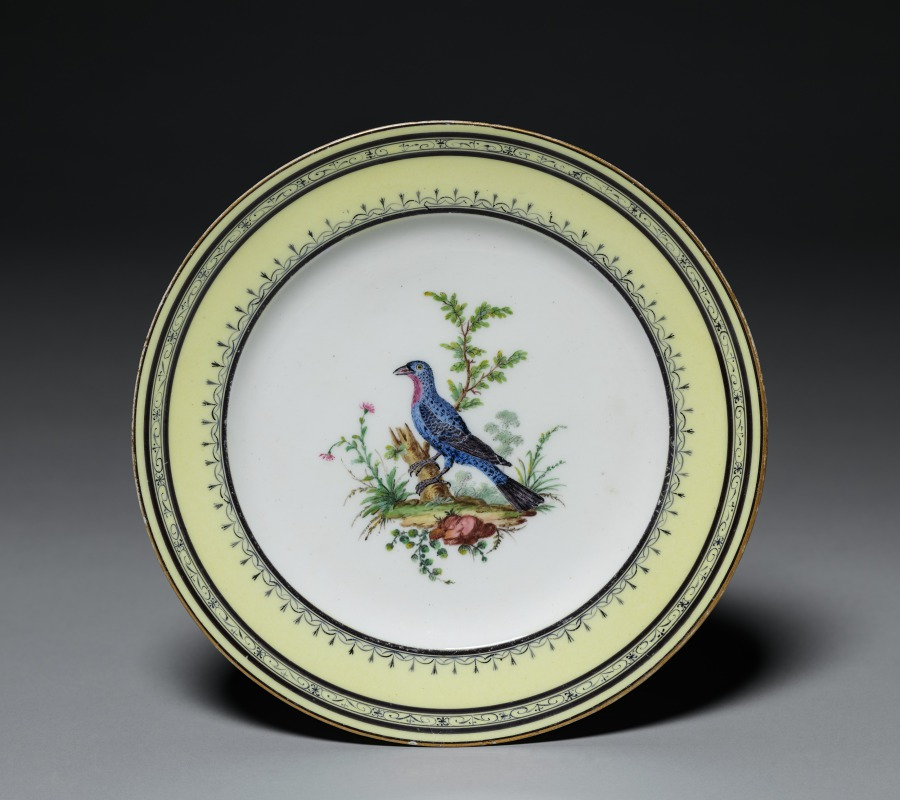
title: Plate (assiette unie)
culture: France, Sèvres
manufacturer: Sèvres Porcelain Factory (French, est. 1756)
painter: Etienne Evans (French, 1733–1806)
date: c. 1794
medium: Soft paste porcelain with enamel and gilt decoration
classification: Ceramic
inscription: [In blue, on bottom]: "CONTIGA, DE CAYENNE"; "Sevres RF"; [Painters mark of Étienne Evans (dagger)]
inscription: [Incised on bottom]: "B"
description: French naturalist Georges-Louis Leclerc’s The Natural History of Birds provided models for bird painting in mid-18th-century France. Engravings in this book by François-Nicolas Marinet likely inspired the bird painted on this plate. These popular representations responded to a growing 18th-century French interest in biologically accurate representations of the natural world.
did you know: Identified on the back of the plate as Cotinga, du Cayenne, the bird represented is a spangled continga, a species found in the Amazon rainforest.